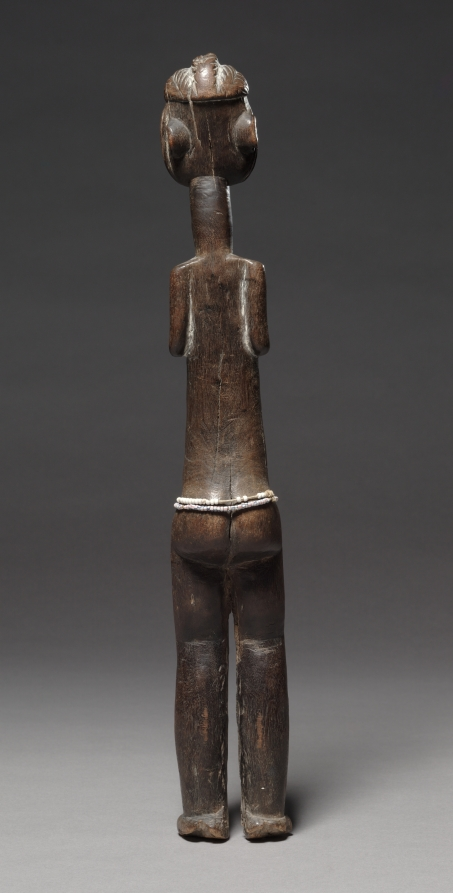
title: Female Figure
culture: Africa, West Africa, Côte d'Ivoire, possibly Bondoukou region, unknown maker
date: late 1800s–early 1900s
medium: Wood, paint, glass beads, and natural fiber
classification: Sculpture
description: An artistic melting pot, the Bondoukou region in northeastern Côte d’Ivoire near the border with Ghana is inhabited by several ethnic groups whose cultures and artistic styles often intermingle. This figure’s rounded shapes and delicate surface decoration––which seem to imitate body scarifications––closely resemble the style of Baule carvings. The figure’s meaning and function remain a mystery.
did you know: Artworks from different regions traveled across Africa; while found in Wenchi, Ghana, this figure was made in nearby Côte d'Ivoire.